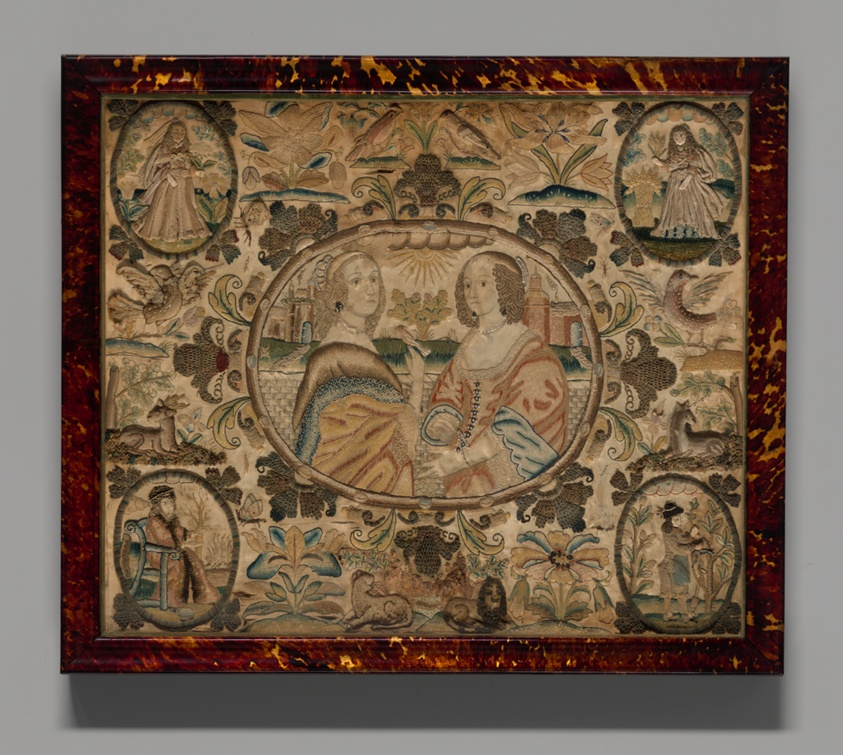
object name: Textile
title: Needlework (Depicting the Four Seasons)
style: 17th Century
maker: England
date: c. 1660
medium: Silk, satin weave; embroidered with linen, silk, silk-wrapped-metal purl, and gilt-metal purl in bullion, raised and detached, knotted and twisted buttonhole, crossed, raised stem filling and satin stitches; couching, laid work, buttonhole picots, French knots, and embroidered pile; seed pearls and mica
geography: England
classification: needlework (visual works); textile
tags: seasons, fire, wheat, fall, men, people, foliage, insects, butterflies, snail, fleur de lis, dresses, birds, deer, lions, animals, flowers, women